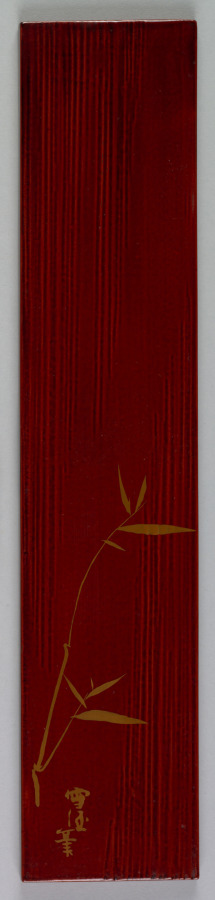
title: Poem Card Box (lid)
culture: Japan, Meiji period (1868–1912)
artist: Kamisaka Sekka (Japanese, 1866–1942)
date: 1868–1912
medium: wood with lacquer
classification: Lacquer